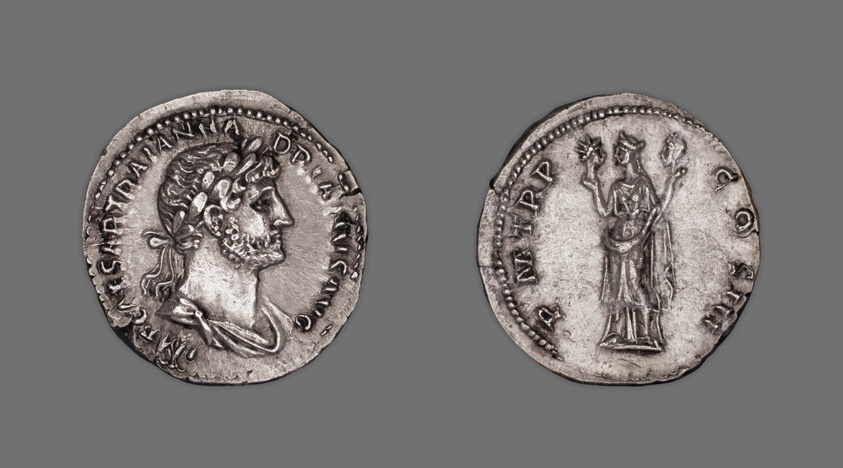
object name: Coin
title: Denarius (Coin) Portraying Emperor Hadrian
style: hadrianic, roman (ancient, style or period), imperial (roman)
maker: Roman, minted in Rome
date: 119-22, issued by Hadrian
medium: Silver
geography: Rome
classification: coin; ancient art